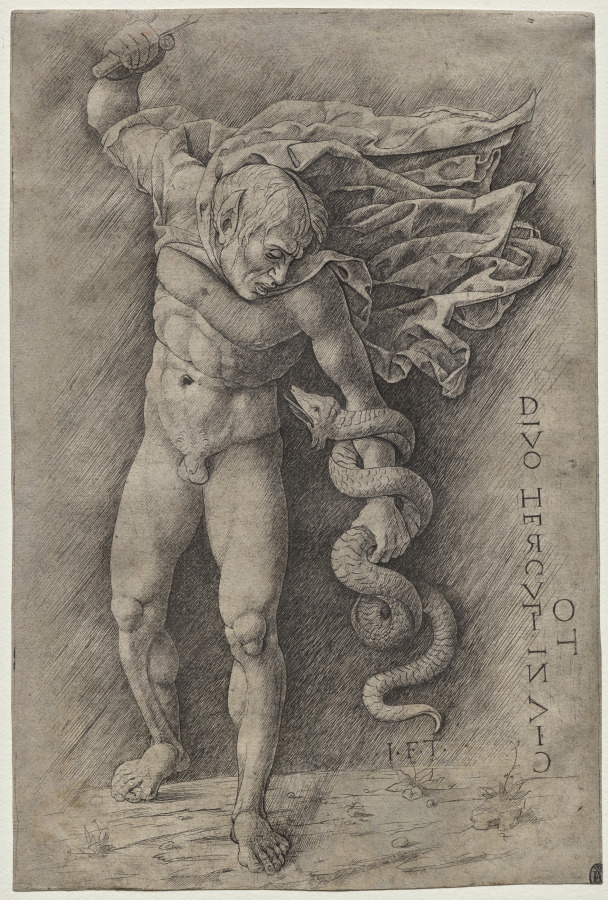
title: Faun Attacking a Snake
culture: Italy, 15th century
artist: Unknown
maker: school of Andrea Mantegna (Italian, about 1431–1506)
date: 1470–1500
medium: engraving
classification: Print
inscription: Lettered vertically down right side: 'DIVO HERCULI INVICTO and I.F.T'.